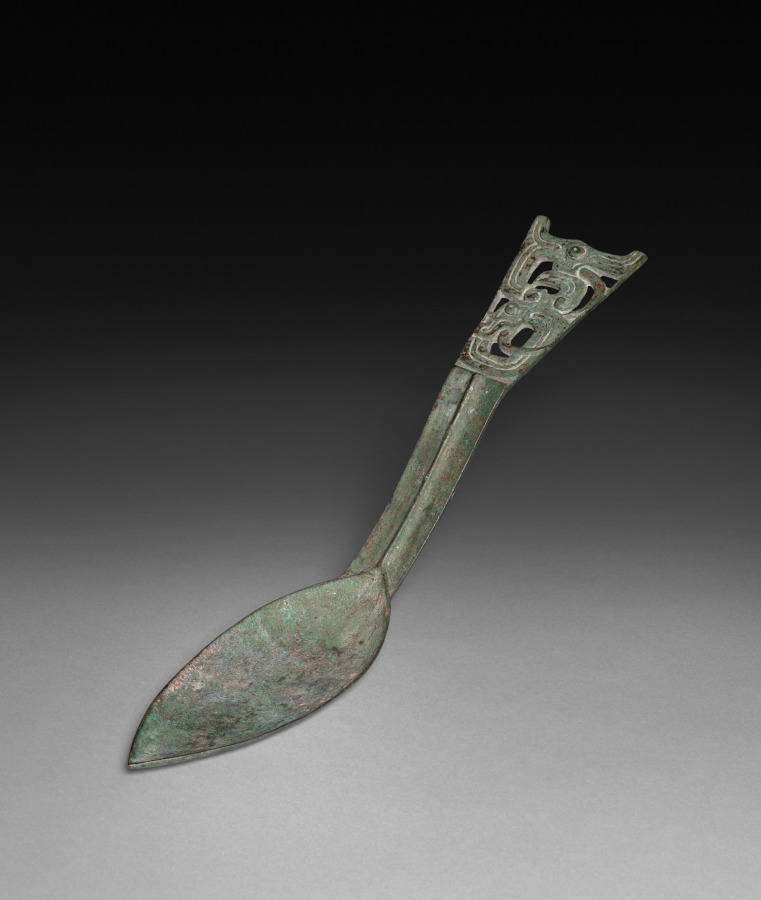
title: Sacrificial Spoon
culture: China, Western Zhou dynasty (c. 1046–771 BCE)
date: 1023–900 BCE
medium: bronze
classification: Metalwork